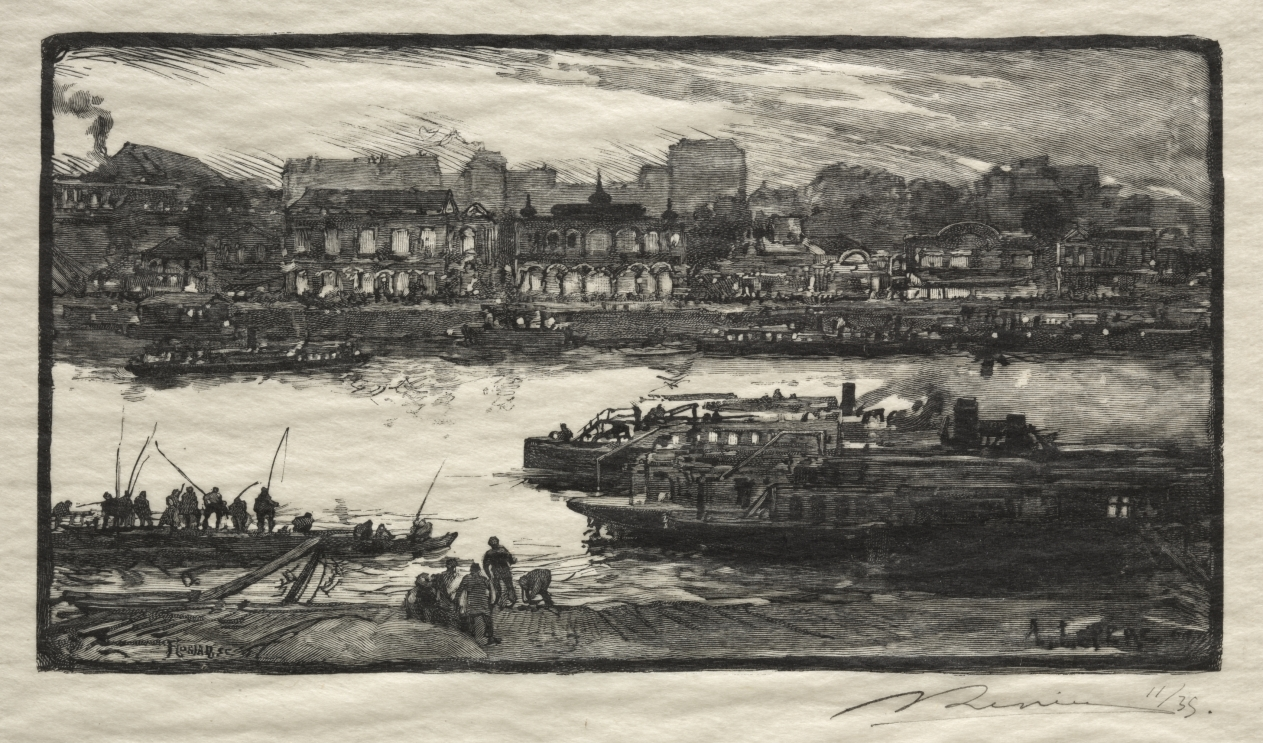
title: Cafès - Chantants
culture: France, 19th-20th century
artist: Auguste Louis Lepère (French, 1849–1918)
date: 1886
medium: wood engraving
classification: Print